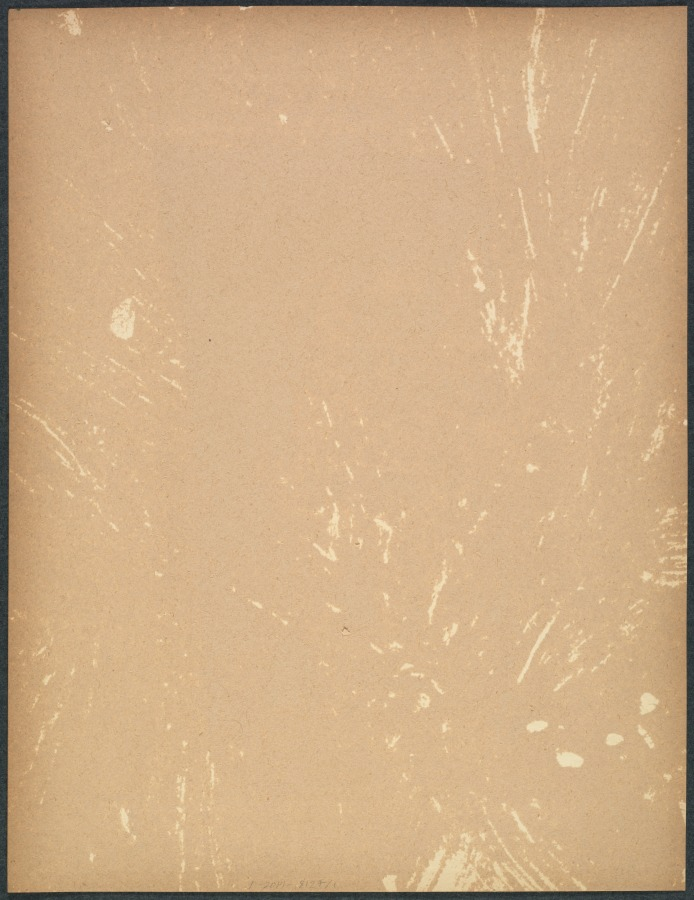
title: A Sinhalese Gentleman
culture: Sri Lanka, 19th century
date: c. 1880s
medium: albumen print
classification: Photograph